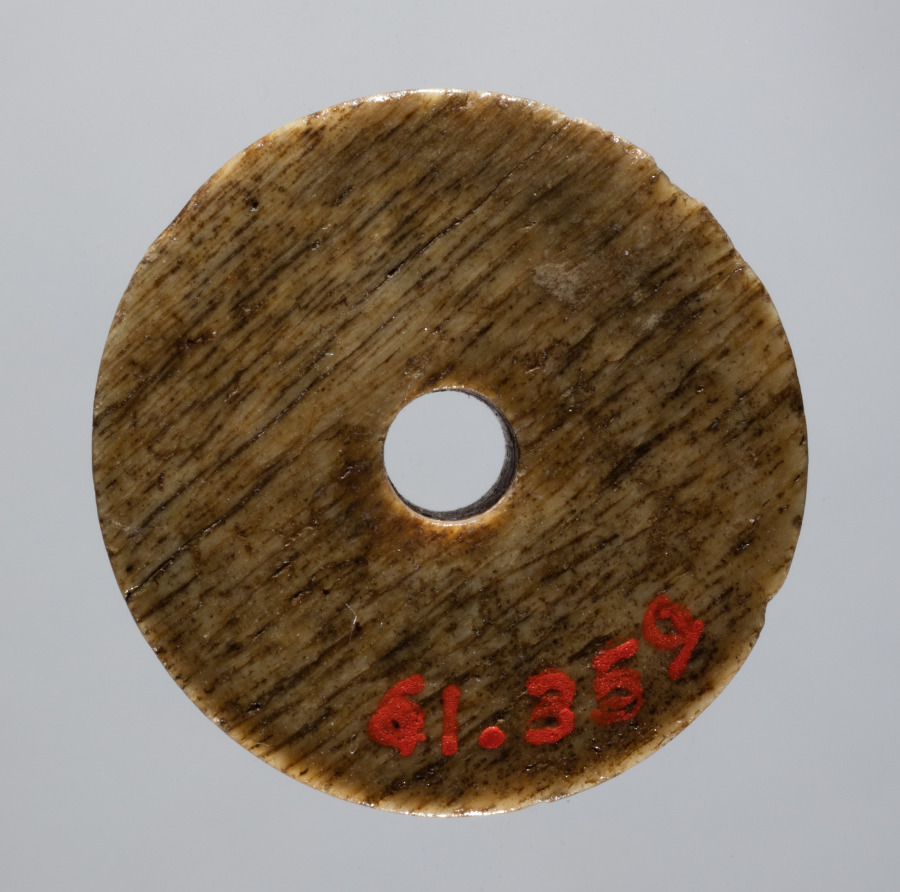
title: Spindle Whorl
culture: Iran, early Islamic period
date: 700s - 900s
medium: bone, incised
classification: Spindle Whorl